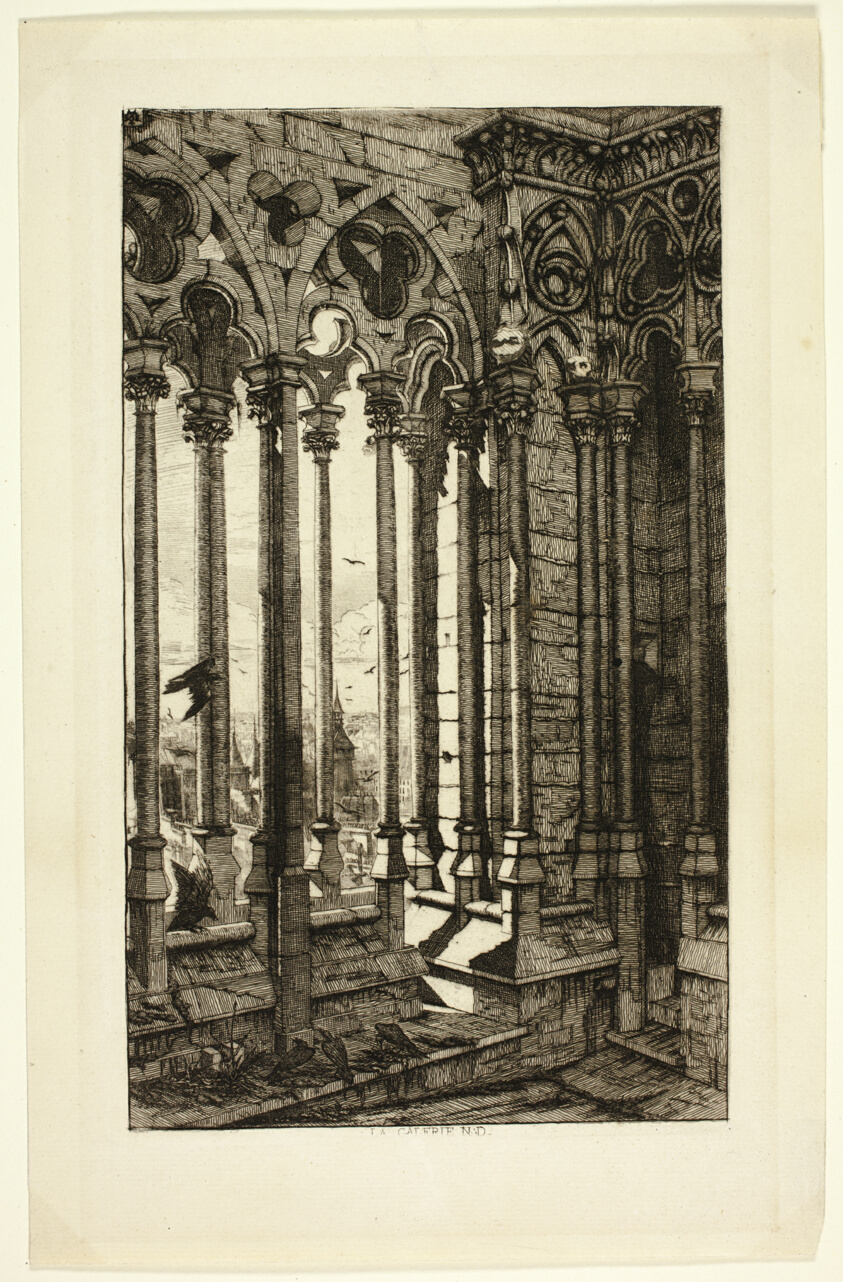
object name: Print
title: La galerie Notre-Dame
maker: Charles Meryon (French, 1821-1868)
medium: Etching on paper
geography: France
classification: etching; print; prints and drawing